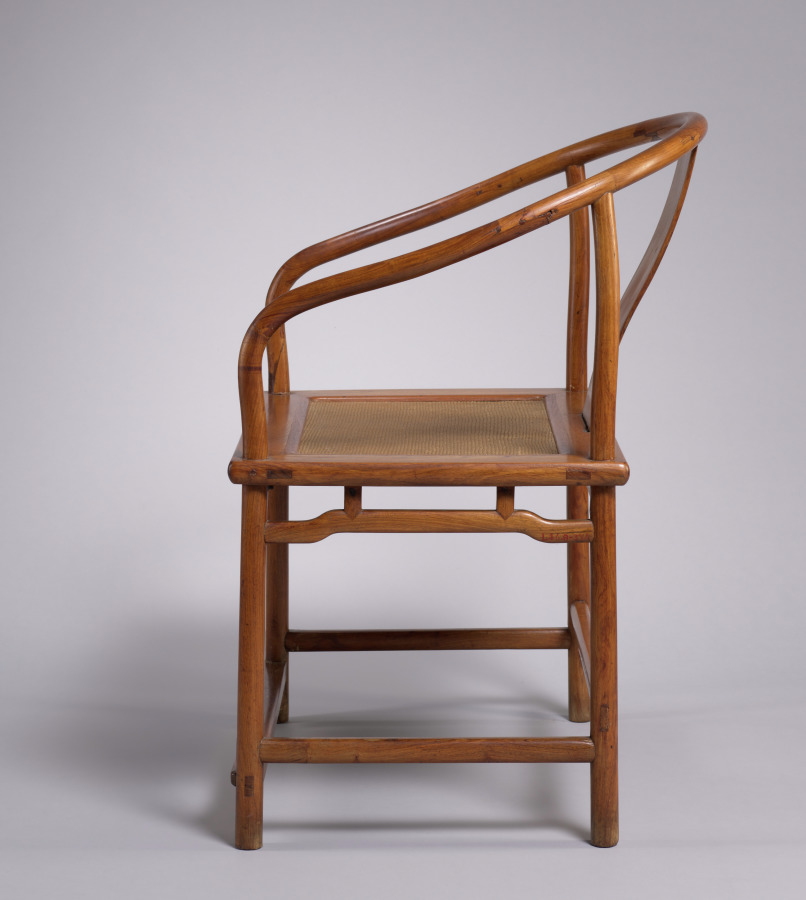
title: Roundback Armchair: Lohan Type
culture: China, Ming dynasty (1368–1644) to Qing dynasty (1644–1911)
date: 1600s–1700s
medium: Rosewood (huanghuali)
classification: Furniture and woodwork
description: In history, China moved from an original floor culture to high chairs and tables, developing a unique tradition of craftsmanship. Although still relatively unexplored, the manufacturing and styles of furniture differ by region. This horseshoe-back armchair was made in Jiangsu province. Its simplicity and minimalist elegance is characteristic of Suzhou-style furniture and aesthetics. The back of the chair is made of seven pieces of wood, joined and secured with an inserted wooden pin, a mortise-tenon technique that appeared in its earliest form in Neolitihic fragments of the Hemudu culture.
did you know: The horseshoe-shaped back of this chair is joined without glue or nails.